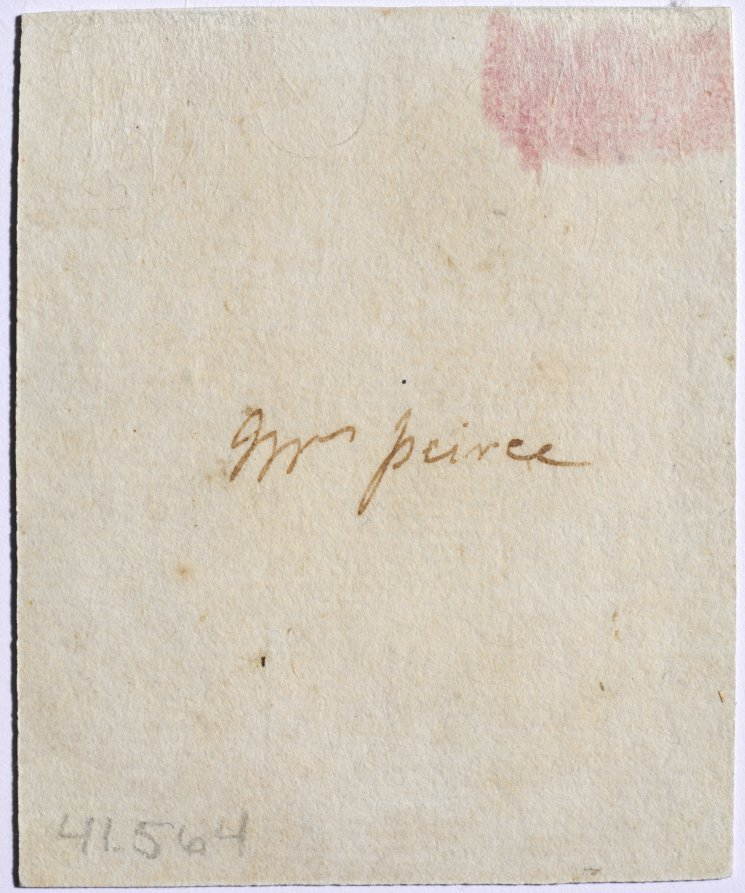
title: Portrait of Anna Maria Woolf, née Smart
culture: England, 18th century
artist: John I Smart (British, 1741–1811)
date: c. 1785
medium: graphite and wash on laid paper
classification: Portrait Miniature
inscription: Signature: none; inscribed on front of paper at upper right corner: 1[?][?]; inscribed on paper backing, in graphite at left center: Indi; upside down, at left above center: 38; inscribed in brown ink at center, on back of drawing: Mrs Peirce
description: Although it is impossible to say whether or not it was always part of the artist’s process to execute a preparatory sketch prior to painting each miniature, we do know that John Smart retained many hundreds of these sketches. A group of preparatory sketches—of which this portrait is one—descended through the Smirke family after Smart’s daughter Sarah gave a sketchbook containing preparatory portrait studies to her friend Mary Smirke, sister of the celebrated Victorian architect Sydney Smirke. This book was probably broken up around 1877 when it was divided between Sydney’s daughters Mary Jemmett and Mrs. Lange, whose portions were both sold at auction in 1928. This portrait was assigned the historically colorful but fictitious title of “Duchess Christina” at some point after memory of its true identity had been lost. Giving illustrious titles to portraits of unknown sitters was a popular strategy adopted by dealers during the nineteenth and twentieth centuries, often applied to miniature portraits and, in particular, to Smart’s sketches of women. Here, the sitter’s head is turned slightly to her left. She has dark brown eyes, rosy cheeks, and long, wavy dark hair falling below her shoulders. She wears a white dress with long sleeves and a ruffled bodice, and a small lozenge-shaped pendant around her neck. She is placed inside a faintly suggested oval, and the background is unpainted. The paper backing—removed in 1993—was inscribed with “38” and “Indi,” which may suggest that the sketch was executed during Smart’s time in India. The inscription that was discovered on the back of the drawing after the paper backing was removed reads, “Mrs [or perhaps Miss] Peirce.” Although the inscription appears to be in the artist’s hand, and in the brown ink he used to annotate his preparatory sketches, its relationship to this portrait is unclear. The sitter is probably Anna Maria, Smart’s eldest daughter by his first wife, whose name is unknown. Anna Maria (1766–1813) traveled with her father to India in 1785, sailing from England on April 19 and arriving in Madras on September 6. If the work was executed in India at the time Anna Maria accompanied her father there, the sketch may be dated to around 1785, the year they moved to the subcontinent. Anna Maria would have been around 18 years old. The fact that this portrait is of an older girl who dons a plain, modest dress and wears her hair down suggests an intimacy not found in the type of portraits Smart commonly executed of women wearing fine gowns and elaborately dressed hair.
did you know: After living in India for many years, Anna Maria was en route to England when she was forced to disembark at St. Helena to give birth to her son.